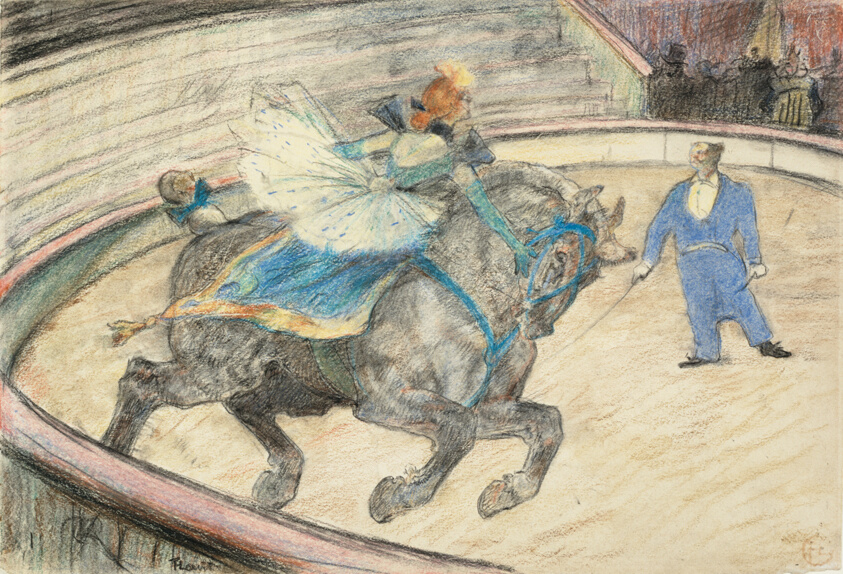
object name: Drawing and Watercolor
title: At the Circus: Work in the Ring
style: Post-Impressionism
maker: Henri de Toulouse-Lautrec (French, 1864-1901)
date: 1899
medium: Charcoal, pastel, and black chalk, with stumping, touches of colored pencil, and incising, on off-white wove paper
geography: France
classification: pastel; drawings (visual works); prints and drawing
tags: circles, women, work, leisure